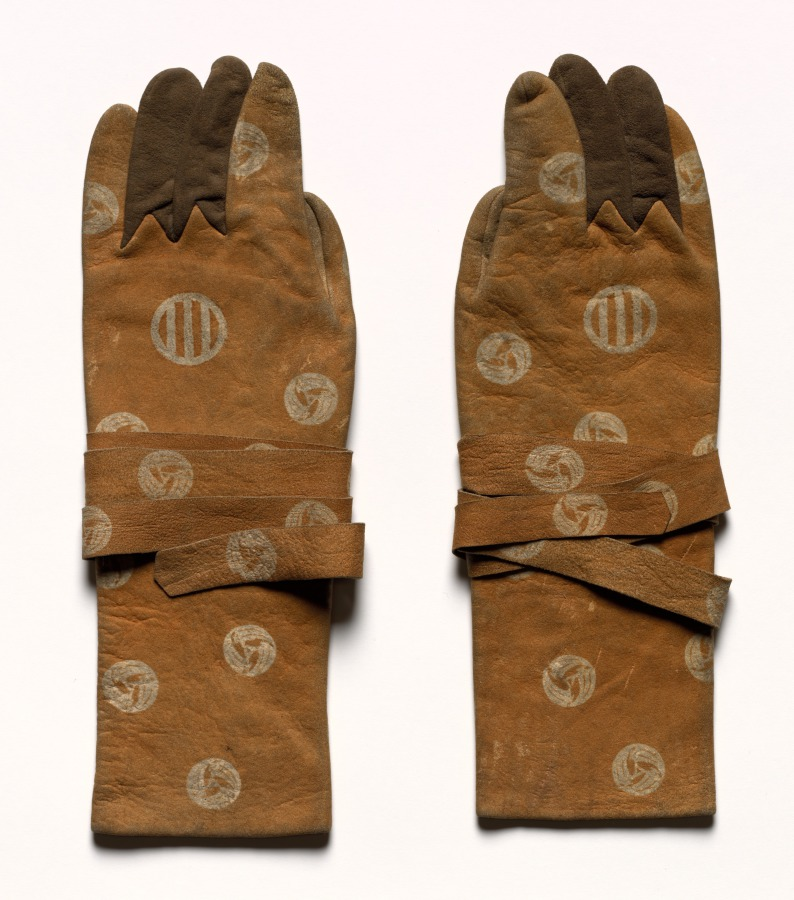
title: Pair of Archer's Gloves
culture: Japan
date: 1800s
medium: chamois leather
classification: Garment